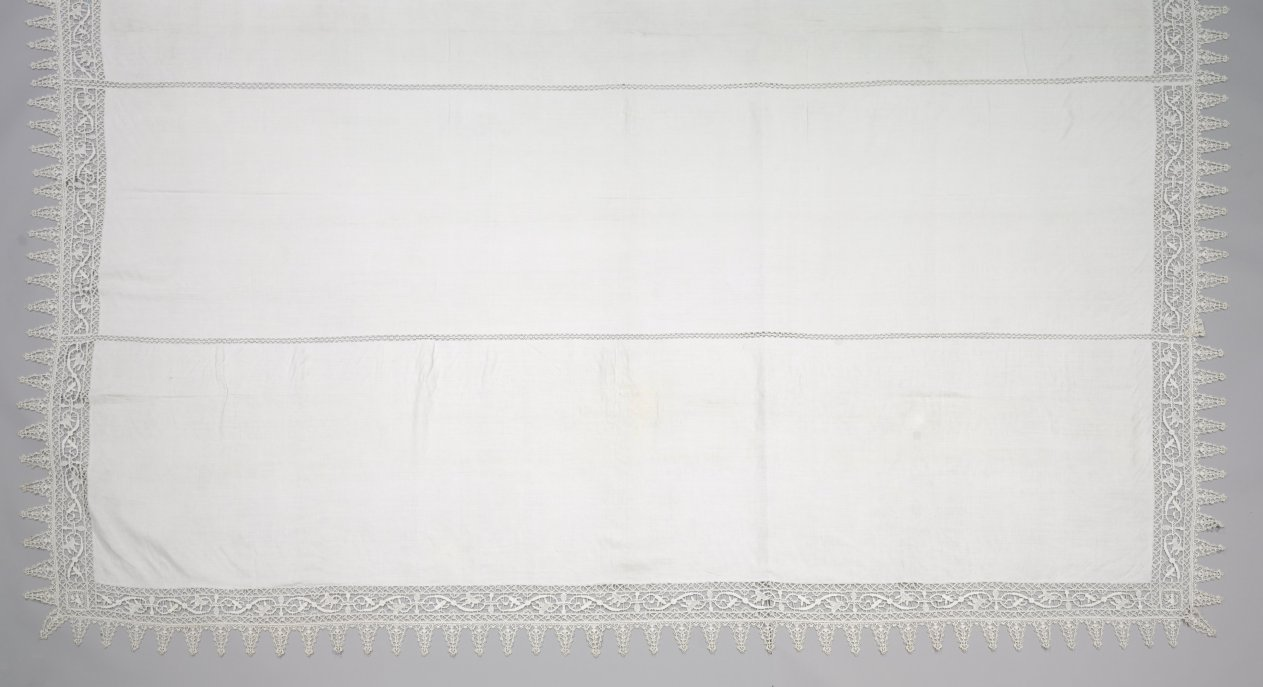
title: Lace Cloth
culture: Italy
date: 1560–99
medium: Linen: needle lace (reticella) insertion and bobbin lace insertion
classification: Lace